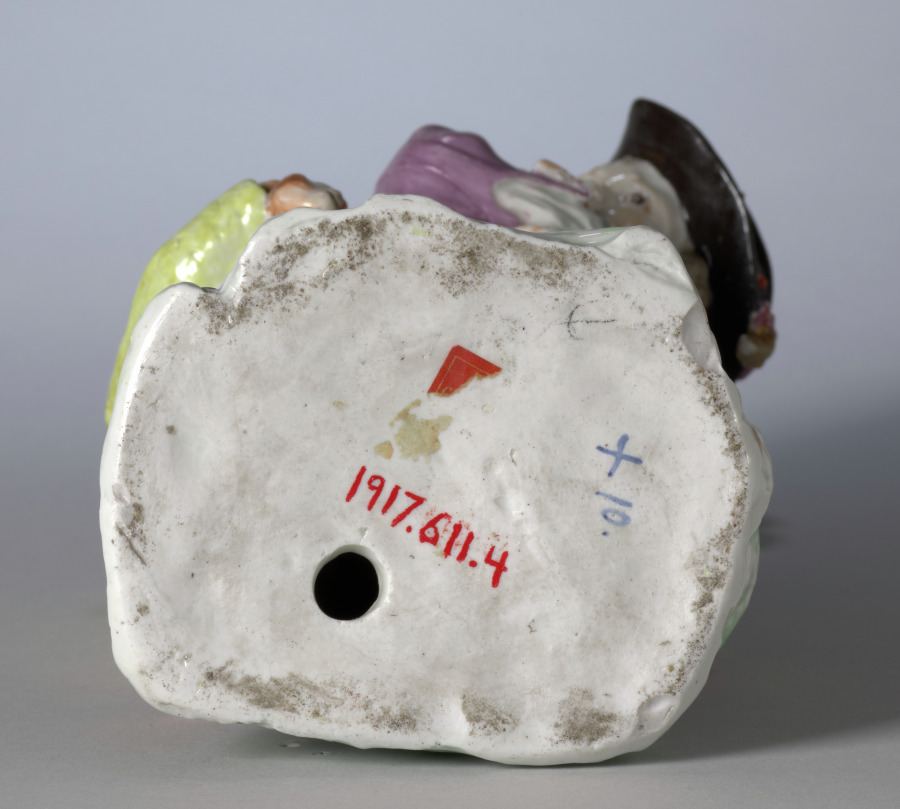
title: Figure of Winter from the Four Seasons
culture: England, Bristol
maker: Bristol Porcelain Factory (British, 1770–81)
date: c. 1775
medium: hard-paste porcelain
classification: Ceramic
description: The modern notion of childhood as a time of innocence and simplicity emerged during the second half of the eighteenth century. This understanding of adolescence led to numerous depictions of children as personifications of the four seasons. Here winter is portrayed as a young boy wearing ice skates, a fur-lined jacket, and a hat adorned with holly branches. In his satchel he carries a goose and rabbit, both of which are commonly hunted in the winter.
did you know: Allegorical figures most often decorated a table during the dessert course, providing amusing subjects for conversation.